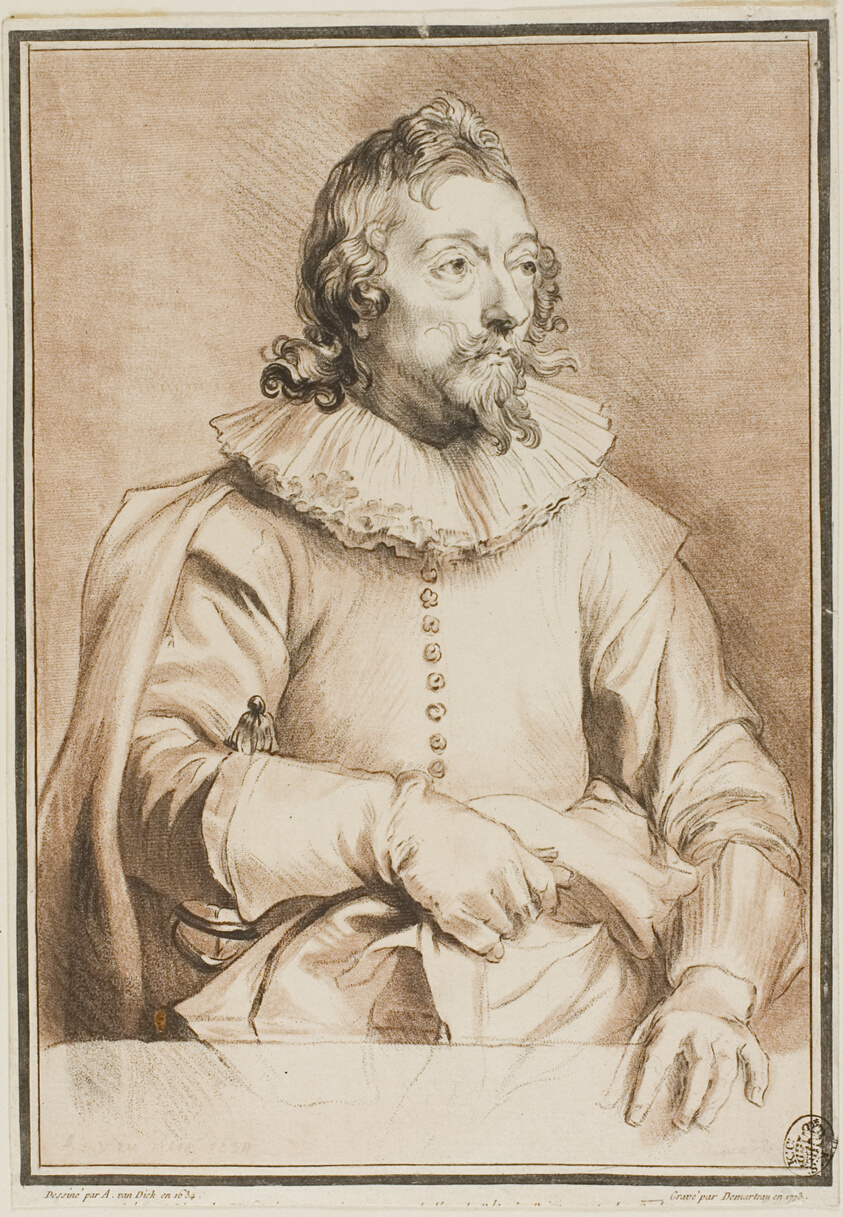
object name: Print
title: Jacomo de Cachiopin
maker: Gilles Demarteau (French, 1722-1776); after Anthony van Dyck (Flemish, 1599-1641)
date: 1773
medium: Crayon-manner engraving in brown and black on ivory laid paper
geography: France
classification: crayon manner print; engraving; print; prints and drawing